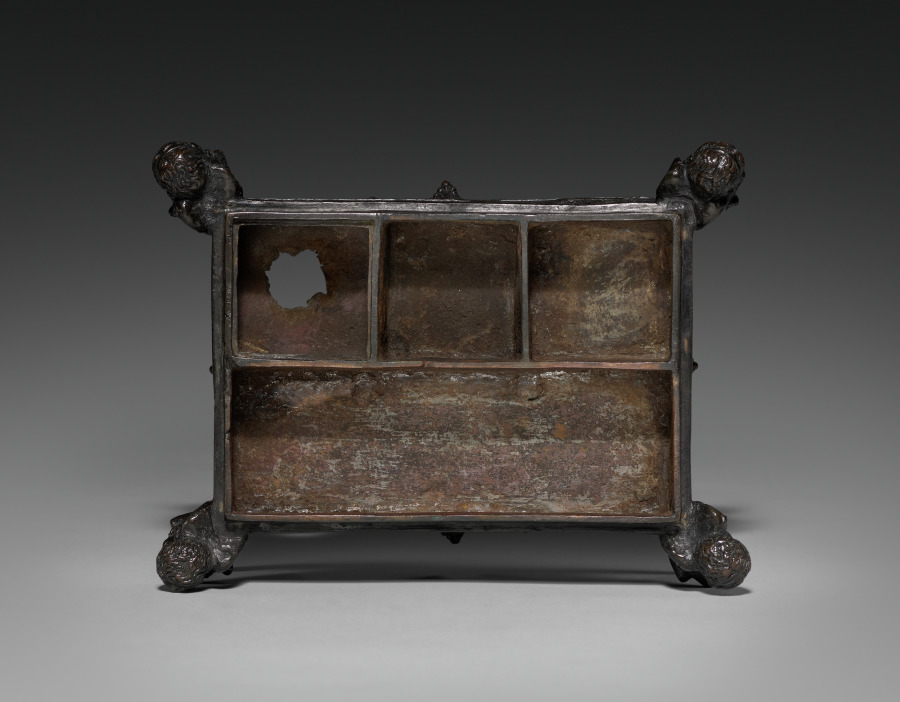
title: Writing Casket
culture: Italy, Ravenna, 16th century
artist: workshop of Severo da Ravenna (Italian, c.1496–c.1543)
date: c. 1525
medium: bronze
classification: Sculpture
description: The interior is divided into four compartments for storing writing implements and sand for blotting.